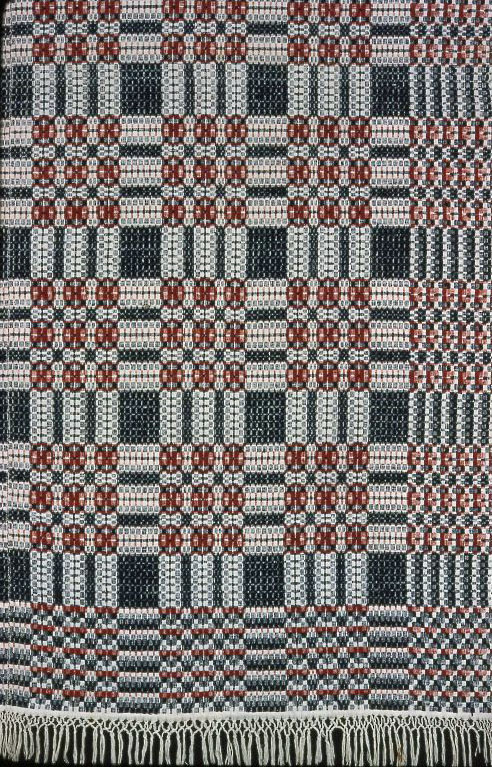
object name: Textile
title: Coverlet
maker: United States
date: 1820/30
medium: Cotton and wool, plain weave with supplementary patterning wefts (overshot); two loom widths joined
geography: United States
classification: textile; coverlet; weaving - coverlet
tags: coverlet